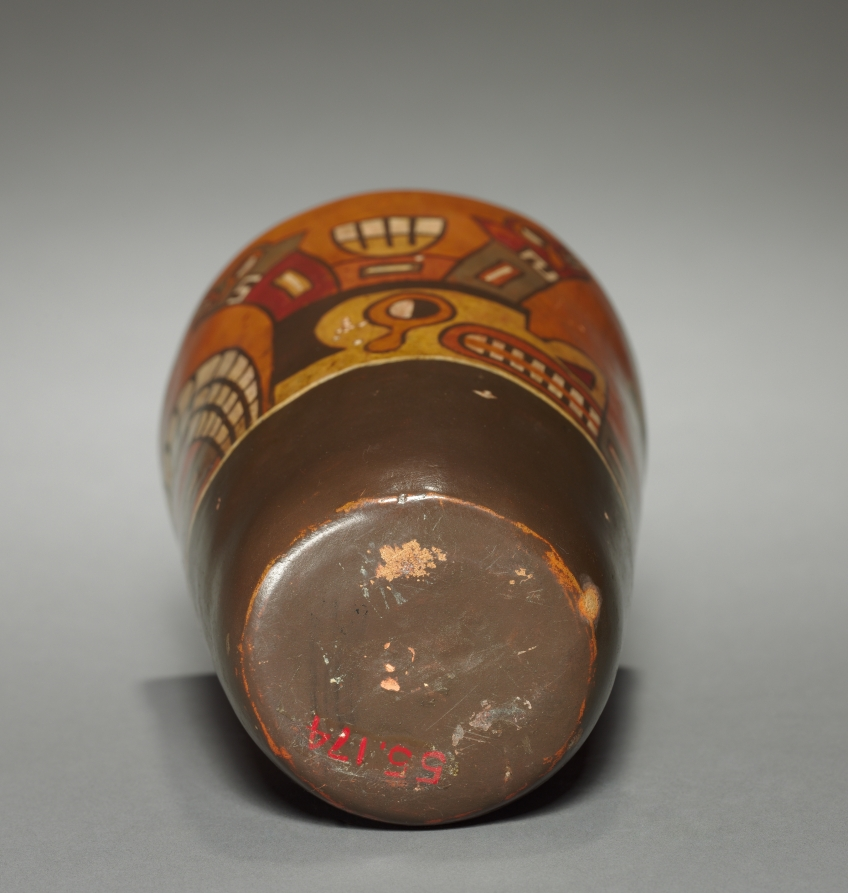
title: Kero-shaped Vessel (modern version of a Wari-style vessel)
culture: Peru, modern, 20th century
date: before 1955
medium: pottery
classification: Forgery